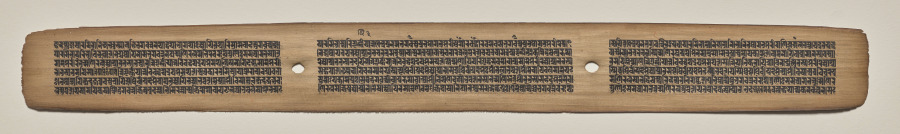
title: Text, Folio 34 (recto), from a Manuscript of the Perfection of Wisdom in Eight Thousand Lines (Ashtasahasrika Prajnaparamita-sutra)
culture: Eastern India, Bihar, Vikramashila Monastery. Painting: Nepal, Kathmandu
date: Sunday, September 14, 1119 (year 239 of the Newar Samvat in the month of Ashvina)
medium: gum tempera and ink on palm leaves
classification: Painting